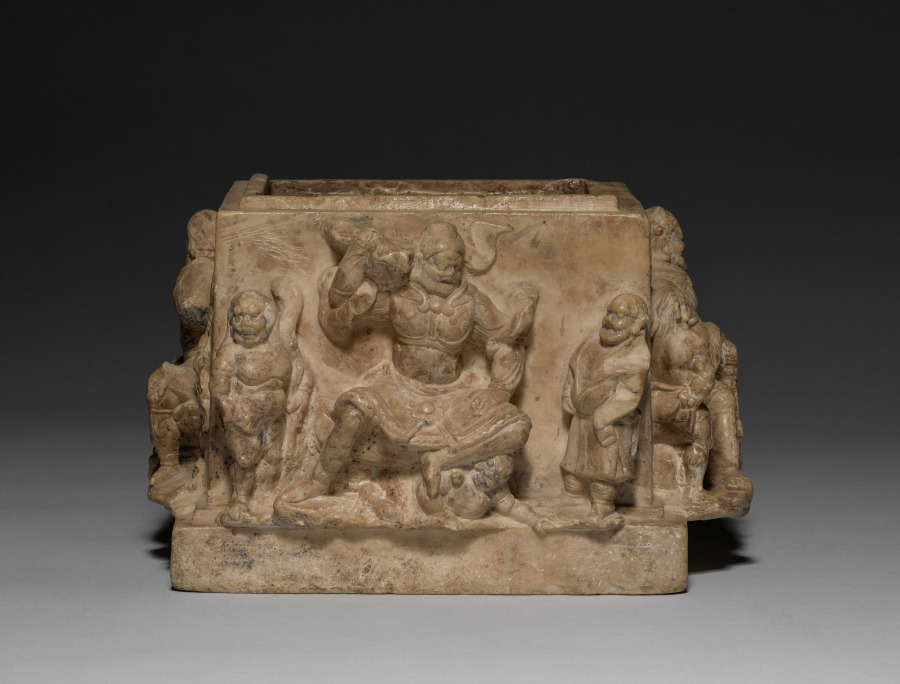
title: Square Urn with Celestial Guardians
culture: China, Tang dynasty (618–907)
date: 700s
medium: marble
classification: Sculpture